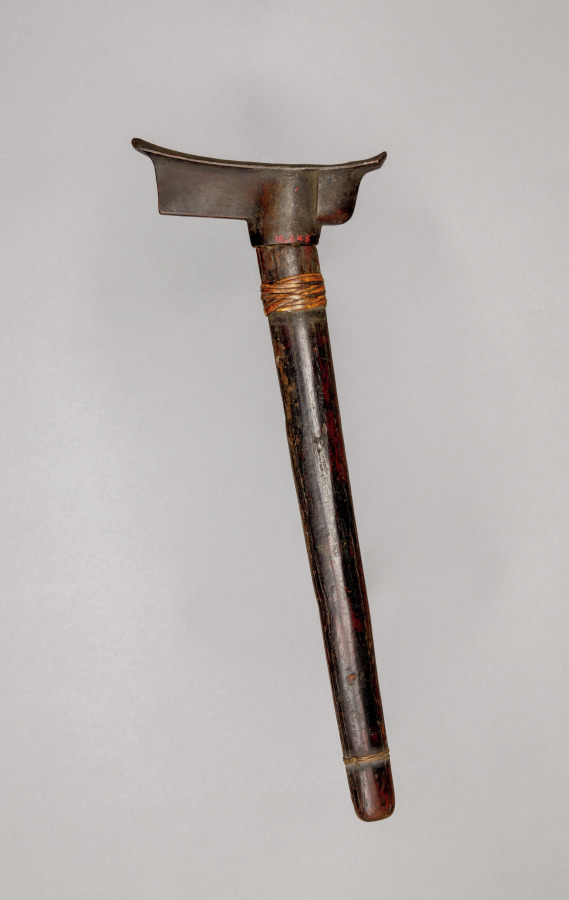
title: Sword (Kris)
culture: Java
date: 1800s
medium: iron with carved wooden handle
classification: Arms and Armor